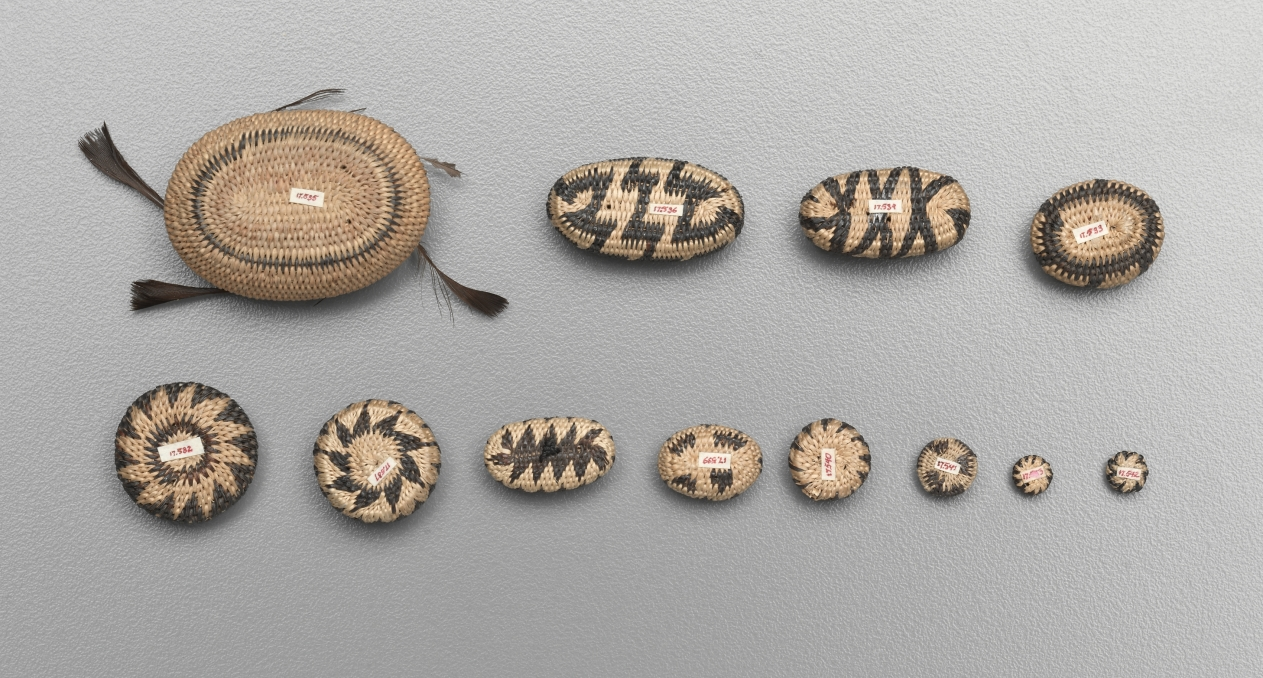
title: Miniature Rhomboidal Basket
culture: California, Pomo, late 19th-early 20th century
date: late 1800s-early 1900s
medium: plant materials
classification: Basketry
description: Miniature baskets were made to demonstrate the basket-maker’s virtuoso skill, and these tiny marvels seem to be no exception—the smallest are just a few millimeters wide but still patterned. For such fine work, dexterity was required as much for preparation of materials as for weaving.